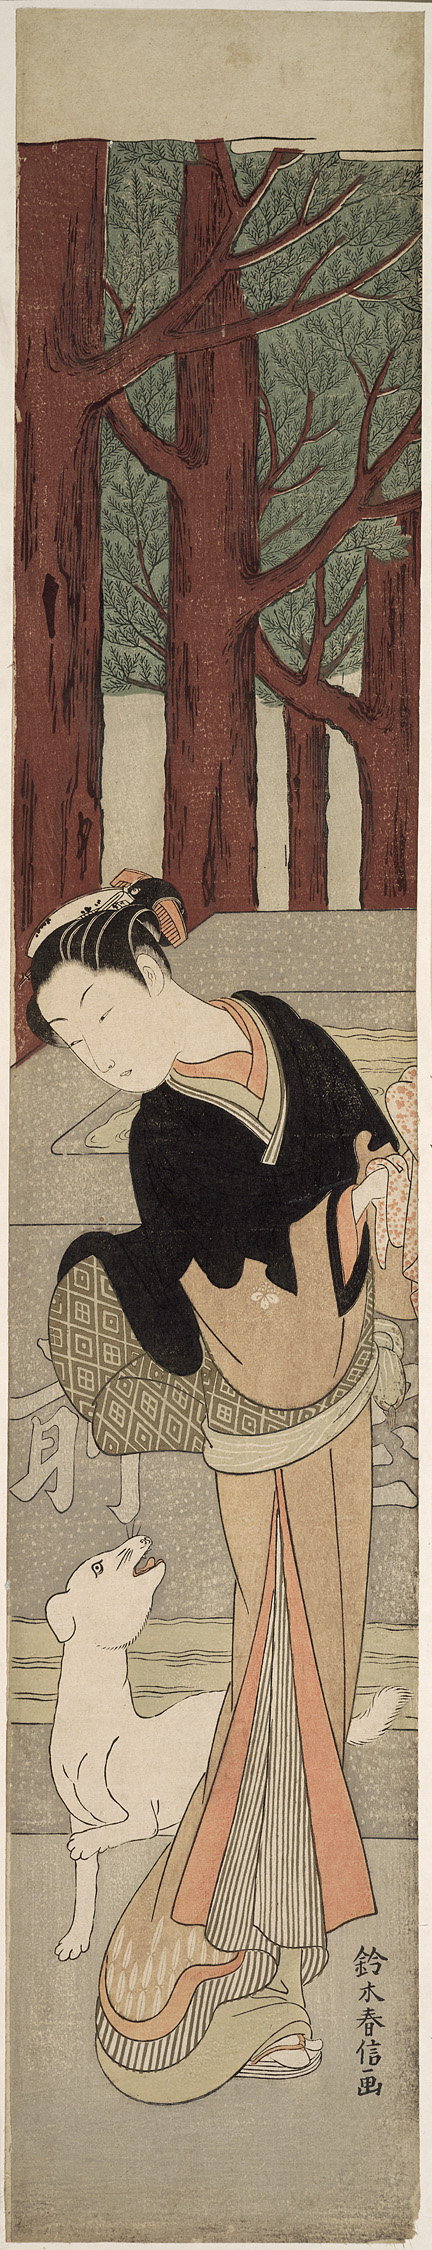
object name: Print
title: Beauty and a White Dog at a Shrine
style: Japanese (culture or style)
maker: Suzuki Harunobu 鈴木 春信; Japanese, 1725 (?)-1770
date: c. 1769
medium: Color woodblock print; hashira-e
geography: Japan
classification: woodblock print; print; asian art